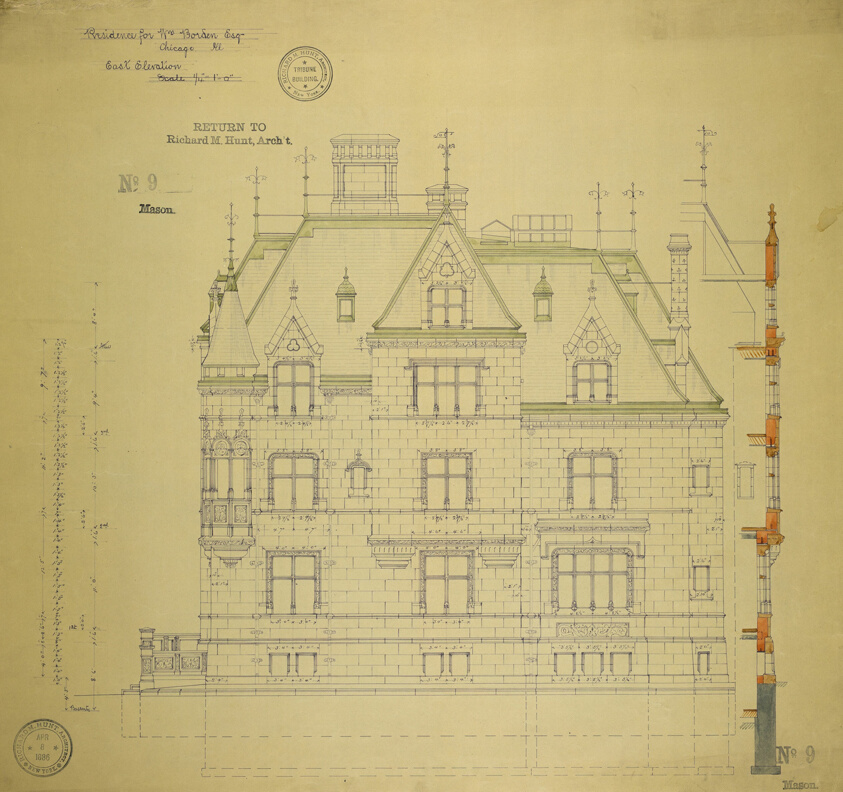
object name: Architectural Drawing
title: William Borden Residence, Chicago, Illinois, East Elevation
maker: Richard Morris Hunt (American, 1827-1895)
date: 1886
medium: Watercolor on hectographic print, mounted on linen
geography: Chicago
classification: working drawing; architectural drawing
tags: Chicago